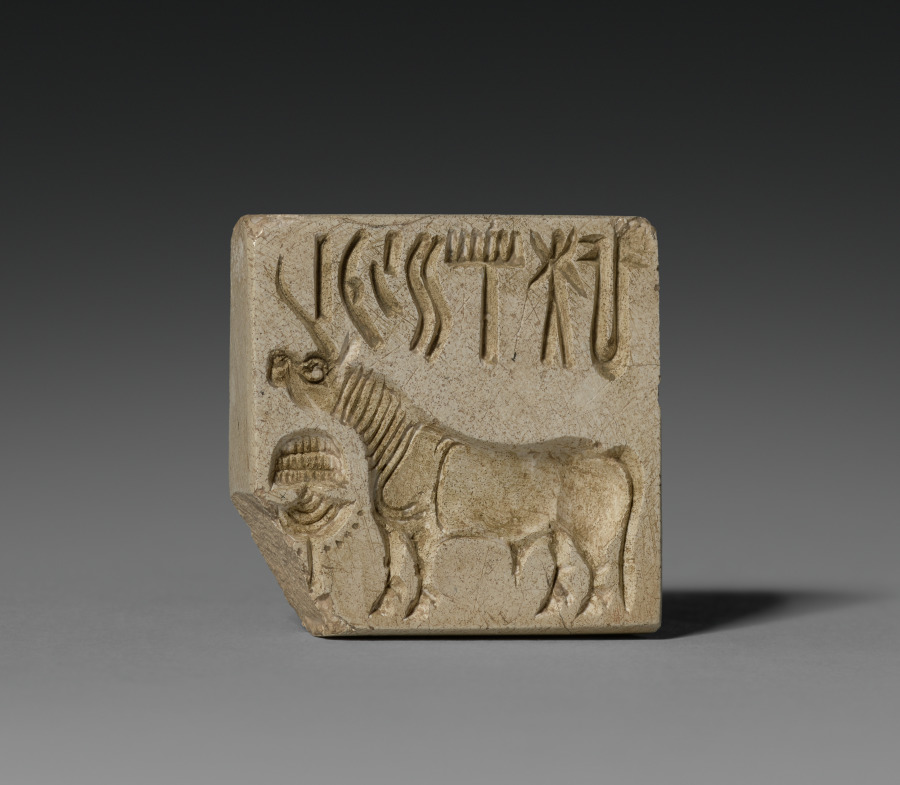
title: Seal with Unicorn and Inscription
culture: Pakistan, Indus Valley civilization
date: c. 2000 BCE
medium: steatite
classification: Seals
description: Indus Valley seals appear to have been hung on a string that passed through a boss on the reverse side. This animal, carved with detailed markings around his neck and forequarters, has his head positioned over an object on a stand that may be interpreted as an altar or brazier or censer; it is not known whether it is for offerings to or sacrifice of the animal.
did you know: Specialists disagree as to whether single-horned bovines actually lived during the time of the Indus Valley Civilization, four thousand years ago.